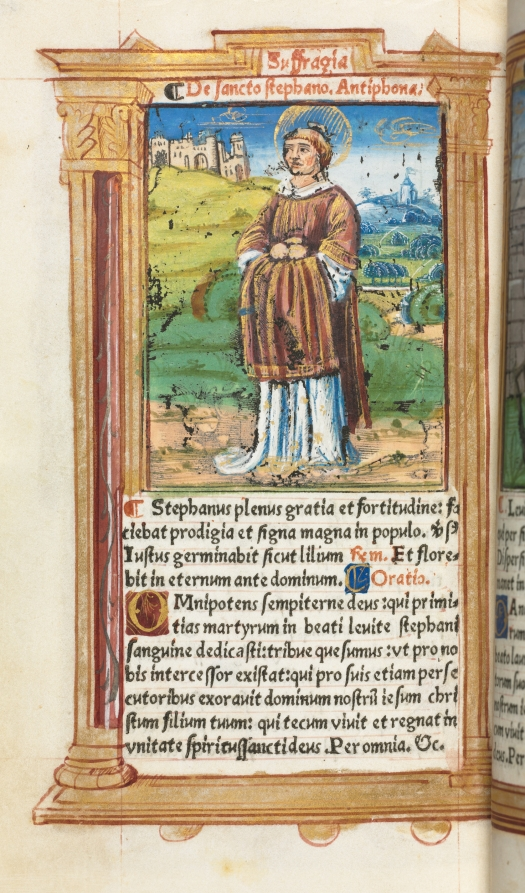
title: Printed Book of Hours (Use of Rome): fol. 100v, St. Stephen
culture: France, Paris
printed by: Guillaume Le Rouge (French, Paris, active 1493–1517)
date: 1510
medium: 112 Printed folios on parchment, bound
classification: Bound Volume